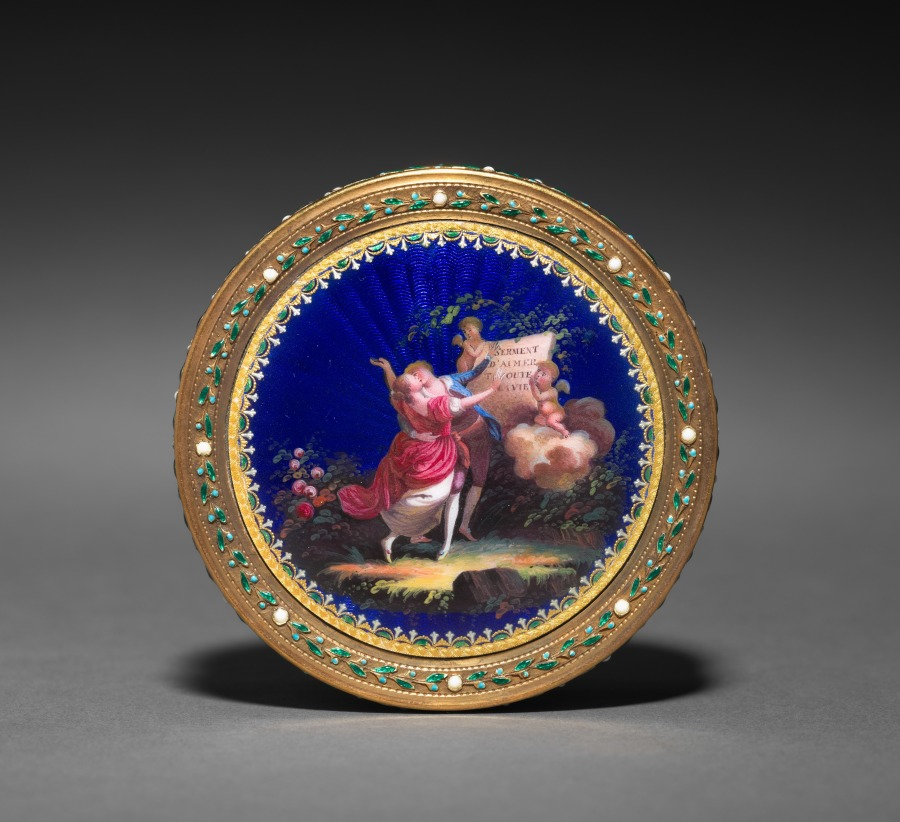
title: Box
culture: France, 18th century (style of Louis XVI)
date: 1700s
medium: gold and enamel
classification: Enamel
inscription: cupids holding book inscribed: Serment d'amour t-outs la vie.